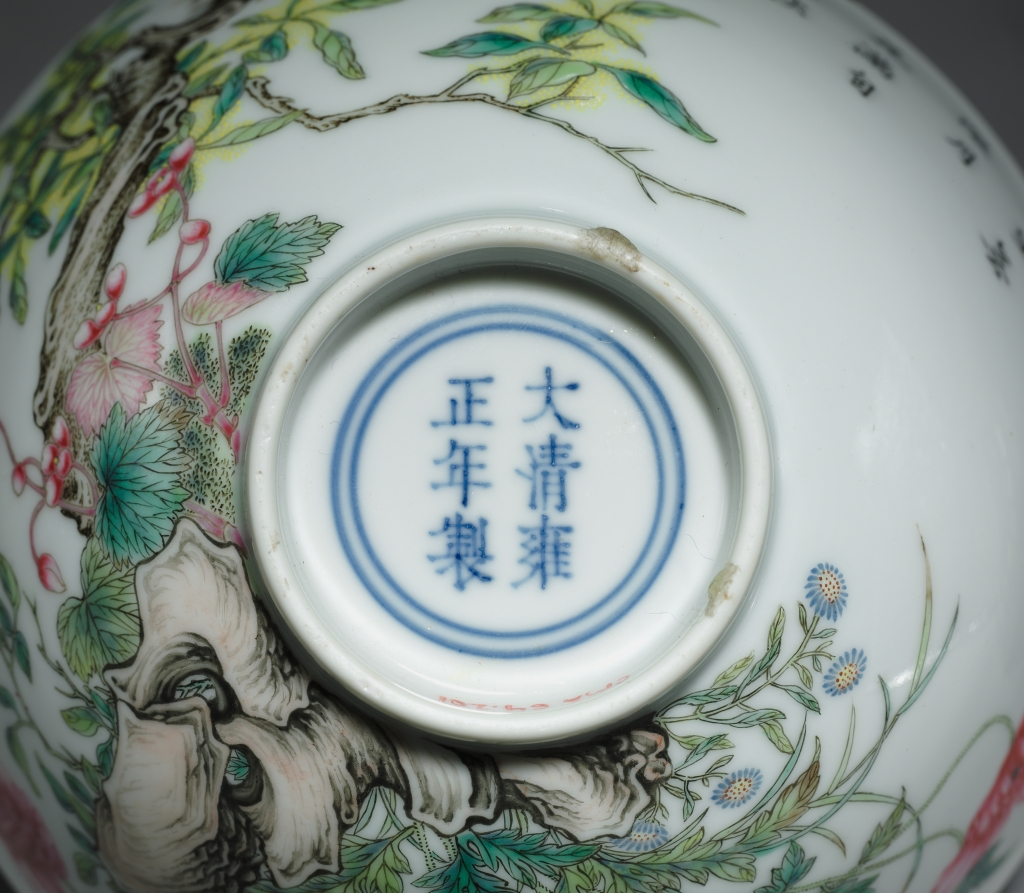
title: Bowl with Poppies, Tree Peony, and Flowering Mimosa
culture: China, Jiangxi province, Jingdezhen, Qing dynasty (1644-1911), Yongzheng mark and reign (1723-1735)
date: 1723–35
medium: porcelain with overglaze enamel decoration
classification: Ceramic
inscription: 大清雍正年制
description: Developments in enamel technology led to new possibilities in polychrome decoration. Pinks appeared, lending their name to the new palette of overglaze colors (famille rose), and the addition of opaque white allowed painters to vary the value of pigments, enhancing the painterly quality of porcelain decoration. As on painted scrolls and album leaves, the image is accompanied with a poem, in this case: "Branches come alive in the moonlight; Blossoms fill the autumn realms."